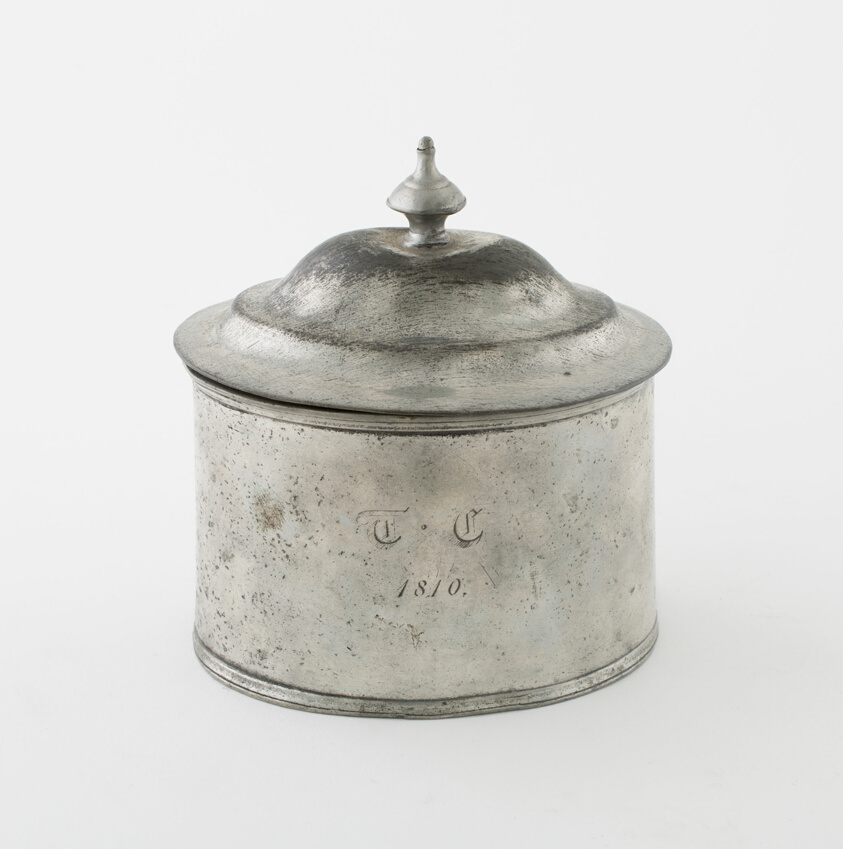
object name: Metalwork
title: Tobacco Box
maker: Possibly Birmingham, England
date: 1810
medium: Cast pewter (base) and Britannia (top)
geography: England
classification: pewter; metalwork; european decorative arts